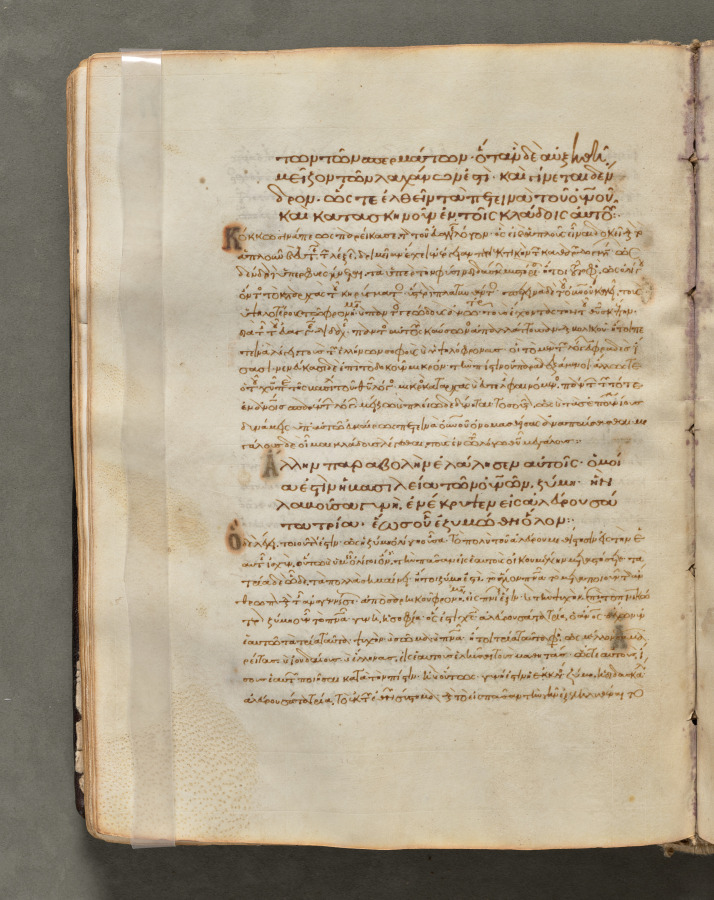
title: Text, folio 60 (verso), from a Gospel Book with Commentaries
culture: Byzantium, Constantinople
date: c. 1000–1100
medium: ink, tempera, and gold on vellum; leather binding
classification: Bound Volume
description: Each of the four gospels in this book opens on a page with brilliantly illuminated borders depicting the author of the text as well as birds-principally peacocks, symbols of the immortality of the soul-and fountains, representing the fountain of life and the salvation of the soul. This volume consists of 428 leaves with texts in Greek. Its level of sophistication suggests that it was probably written and decorated in a monastery in Constantinople.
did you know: Gospel Books were carried in procession through Byzantine churches.